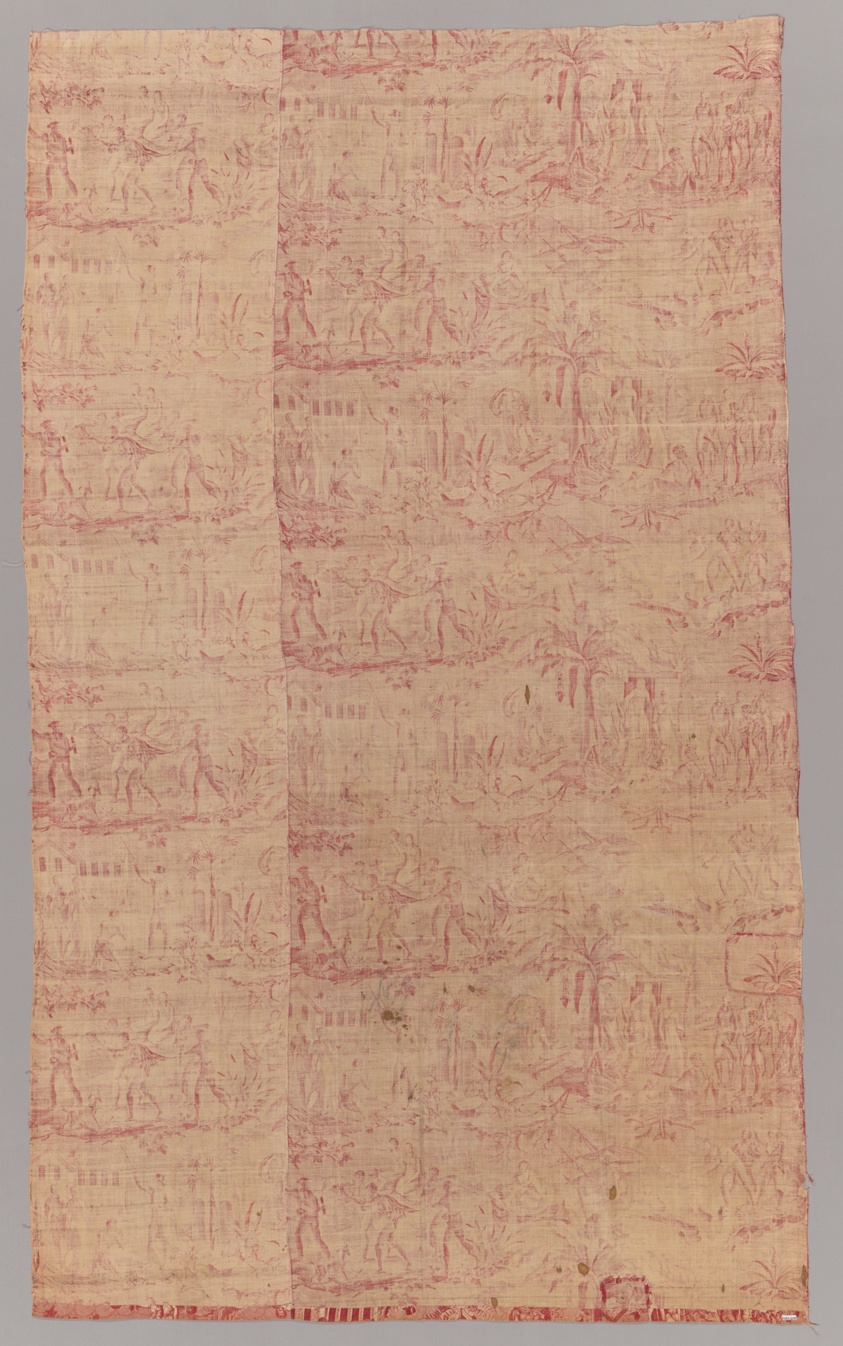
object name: Textile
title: “Paul and Virginie” Furnishing Fabric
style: 19th century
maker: Based on the story by Bernardin de Saint-Pierre (French, 1737-1814)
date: c. 1800-10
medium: Cotton; roller printed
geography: France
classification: weaving - printed; textile; printed textile; furnishing textile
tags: people, trees, dogs, children, friendship, island, love, ships, wreckage